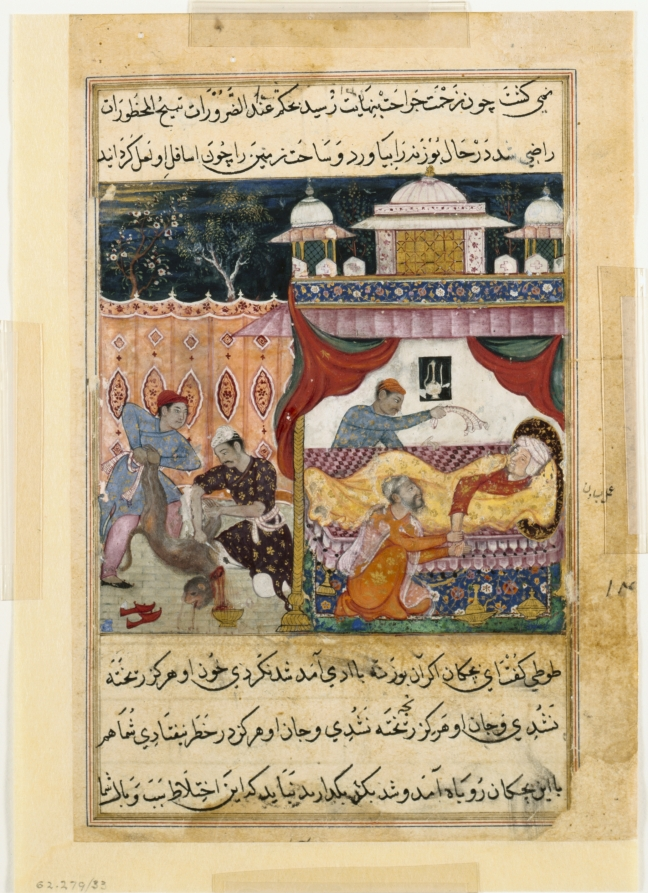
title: The monkey slain, his blood to be used as medicine for the ailing prince he has bitten, from a Tuti-nama (Tales of a Parrot): Fifth Night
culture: Mughal India, court of Akbar (reigned 1556–1605)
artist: Basawan​ (Indian, active mid-1500s)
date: c. 1560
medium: gum tempera, ink, and gold on paper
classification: Painting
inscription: 'amal basāwan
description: Wounded by the chess-playing monkey’s bite, the prince’s hand became increasingly infected. The only cure, his doctors said, was to apply the blood of the monkey to the wound and let it dry. Reluctantly, the prince allowed the monkey to be killed. Two men accomplish this serious work at the left. In the right margin is written the name of the artist, the celebrated Basavana. The Tuti-nama contains the earliest known paintings by the prolific master who was instrumental in shaping the Mughal painting style over subsequent decades.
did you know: Under the covers is the hand that got infected from the monkey bite.